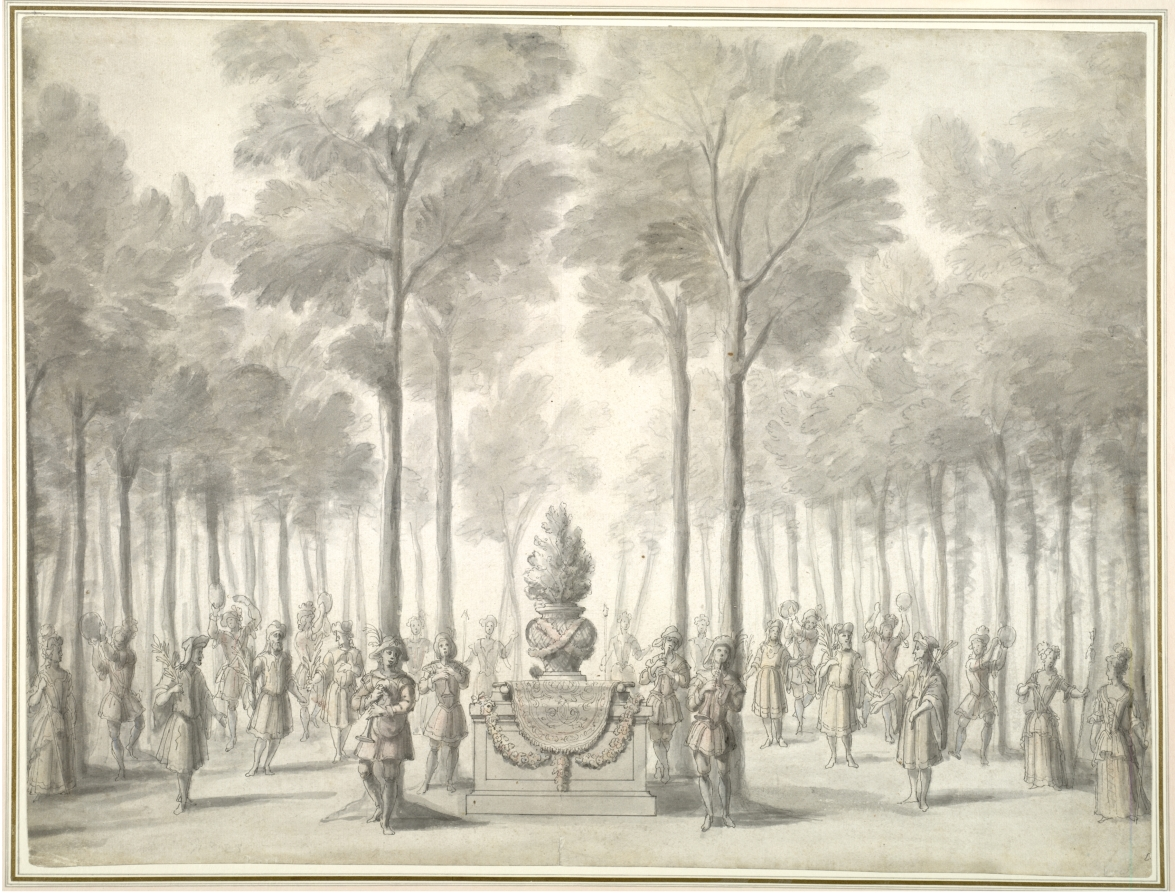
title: Design for the Divertissement from "La Pastorale" (First Entrée of the opera-ballet "Les Muses" by Danchet and Campra")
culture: France, 18th century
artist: Jean I Bérain (French, 1640–1711)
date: 1703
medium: pen and black ink and brush and gray wash with red, blue, and yellow wash, with graphite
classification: Drawing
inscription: lower left, in graphite?: No 23; verso, upper left, in graphite: W; center, in graphite: 1230 [sideways]; lower right, in graphite: Probably Jean Le Pautre / scene [illegible]ment for Louis XIV c. 1670 / The V + A might be able to track it down exactly; lower right, in graphite: clean? / surface / clean? / c / [4 w?] / pretty; lower right, in graphite: xb [crossed out]; x336188.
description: This drawing represents the elaborate stage set for the opera-ballet Les Muses that premiered in 1703 at the Opéra, the most prestigious public theater in Paris. In a city that thrived on spectacle, the opera-ballet was one of the most fashionable forms of entertainment in the 18th century. Berain’s drawing relates to the third scene in the first of four acts, "La Pastorale," in which shepherds and shepherdesses pay homage to deities in a wooded grove. The celebration, accompanied by flutes and a musette (small bagpipe) comprised a lighthearted musical interlude or divertissement, an indispensable component of the opera-ballet.